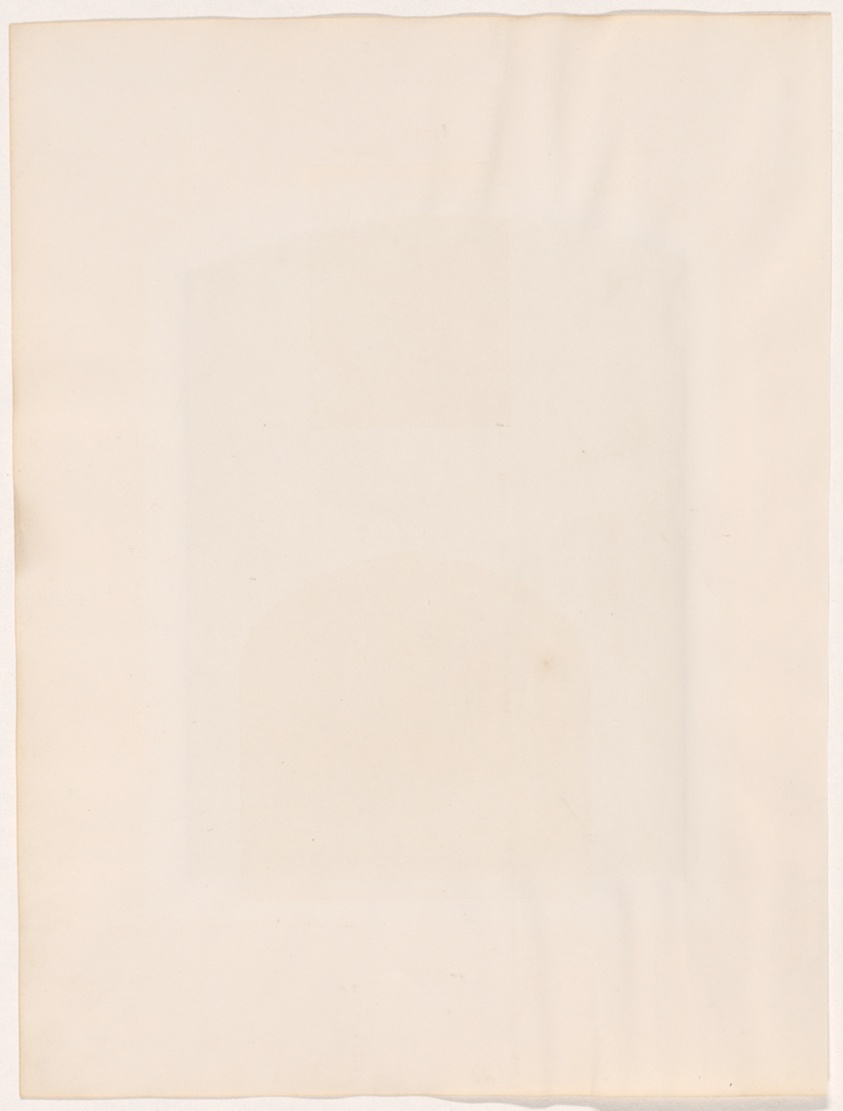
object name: Photograph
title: The Day's Orders (L'Ordre du Jour)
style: 19th century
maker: Camille Silvy (French, 1834-1910)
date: May 1859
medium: Albumen print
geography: France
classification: photograph; albumen silver print; photography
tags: Paris